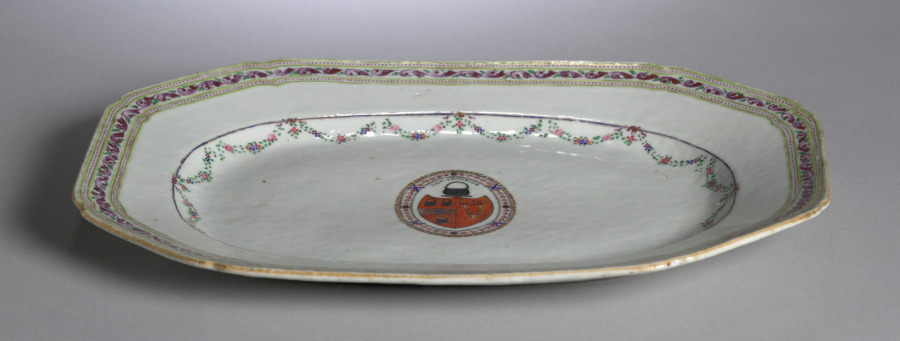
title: Platter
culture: China, Chinese Export, 18th century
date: 1770–85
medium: porcelain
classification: Ceramic